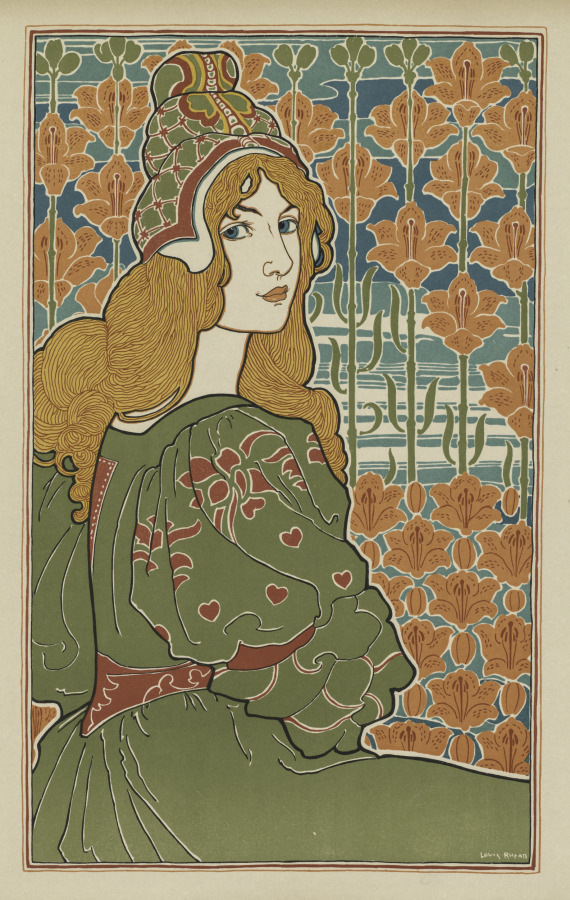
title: L'Estampe Moderne: Jane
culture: America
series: published in L'Estampe Moderne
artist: Louis Rhead (American, 1857–1926)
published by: Imprimerie Champenois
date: 1898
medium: color lithograph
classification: Print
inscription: On mat, in graphite, L to R: FA2178 Louis Rhead (1857-1926) Published by L'Estampe Moderne, No. 19, 1898, their blindstamp lower right corner; "Jane" colour lithrograph c. 1887 $275-